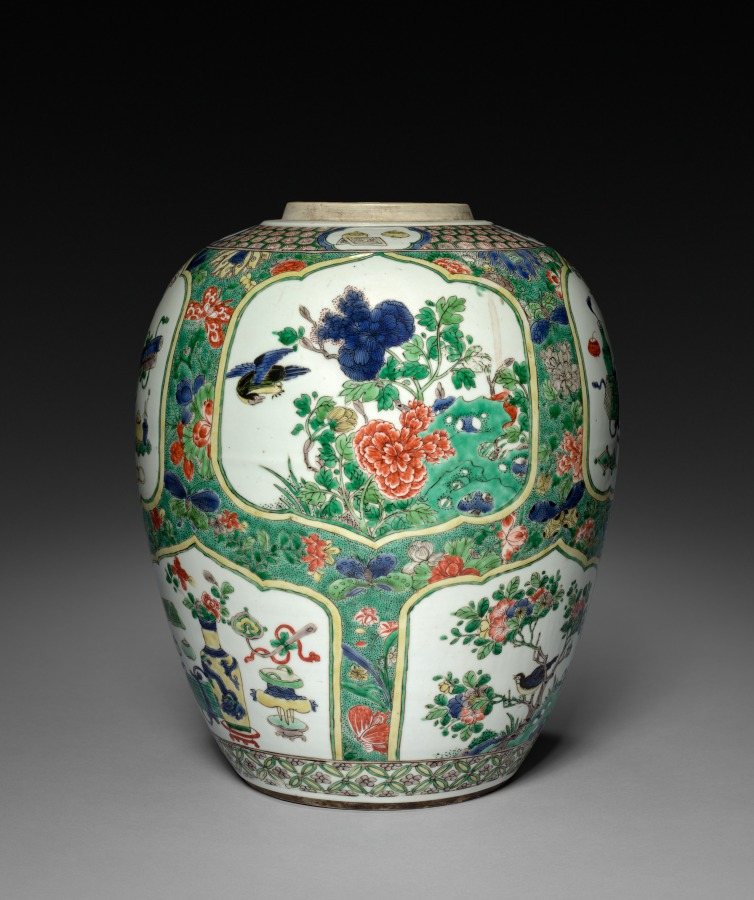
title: Vase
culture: China, Qing dynasty (1644-1911), Kangxi reign (1661-1722)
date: 1622–1722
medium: porcelain with underglaze decoration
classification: Ceramic